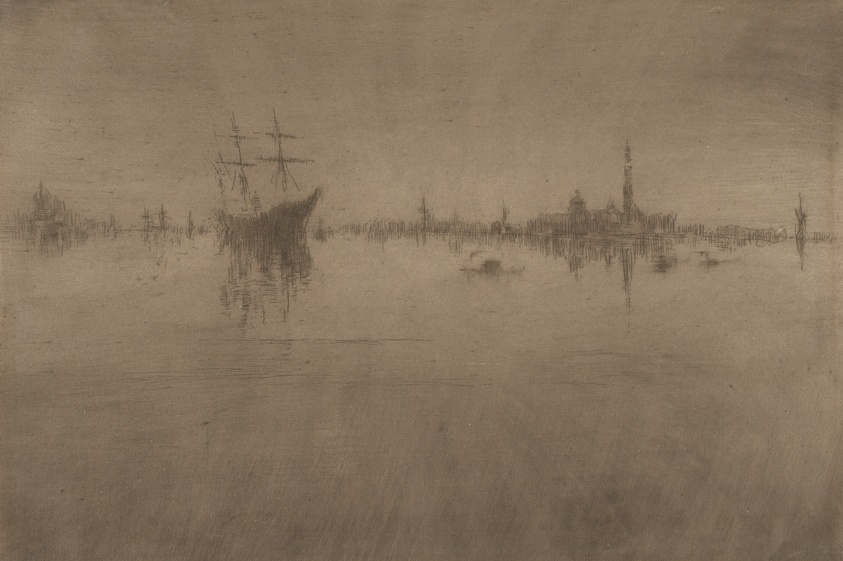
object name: Print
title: Nocturne, from Venice, a Series of Twelve Etchings (the "First Venice Set")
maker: James McNeill Whistler (American, 1834-1903)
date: 1879–80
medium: Etching and drypoint in brown on cream laid paper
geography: United States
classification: etching; print; prints and drawing; paper; drypoint